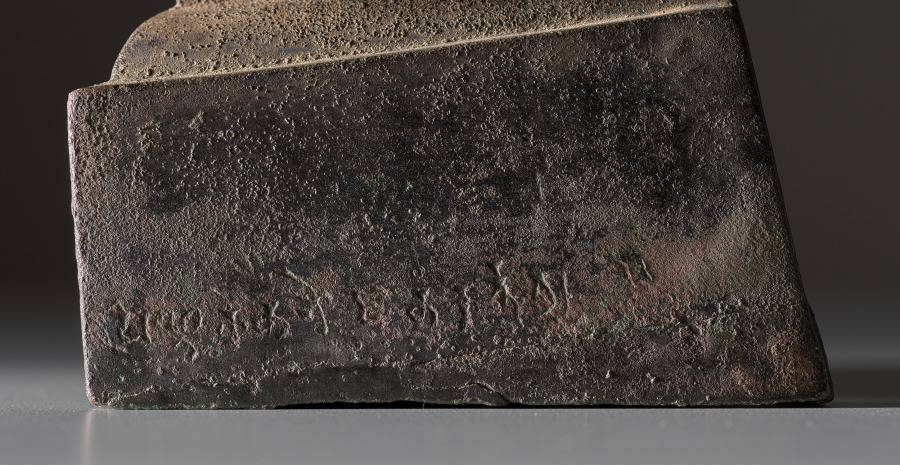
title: Standing Buddha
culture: Northern India, Uttar Pradesh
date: 591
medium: bronze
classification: Sculpture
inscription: 1. ṹ deyadharmmoyaṃ laḍitagrāme yaṃgvalvihāre śā[kya] bhikṣuṇyā 2. pariśuddhamatyā yadattra puṇyaṃ tadbhavatu sarvvasatvānā- 3. manuttarasarvva jñānāvāptaye/ / saṃvat 4a. 500 10 3/ / caityakūta jinabandhuvihārapūrvva-bhuddeśe 4b. piṇḍakena bhojanaṃ karttavya*/ / *Mistake for karttavyam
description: This bronze Buddha is exceptional, because it carries an inscription on its base that dates its manufacture to the year 591. According to the inscription, the sculpture was dedicated by a nun who was from a village in Nepal, but she probably commissioned it at a workshop in northern India. The Buddha's robe on this image has been left plain, without pleat lines to obscure the beauty of the contours of the body. Only the rippling scalloped clusters of the garment’s hem lend some sense of energy and subtle ornament to the composition.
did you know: Around the time when this sculpture was made, portable bronzes began to replace relics as the principal sacred commodity circulating in the Buddhist world.